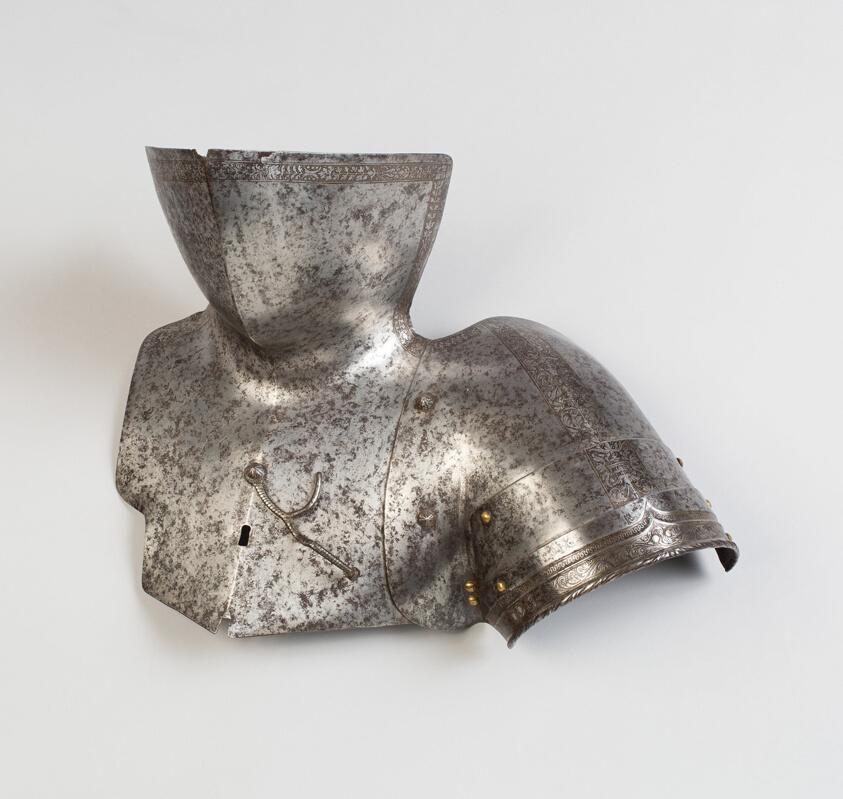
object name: Armor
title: Grandguard and Bevor for the Tourney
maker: North German; Brunswick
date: 1550/60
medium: Steel, brass, and leather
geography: Brunswick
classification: suit-element; armor; arms and armor